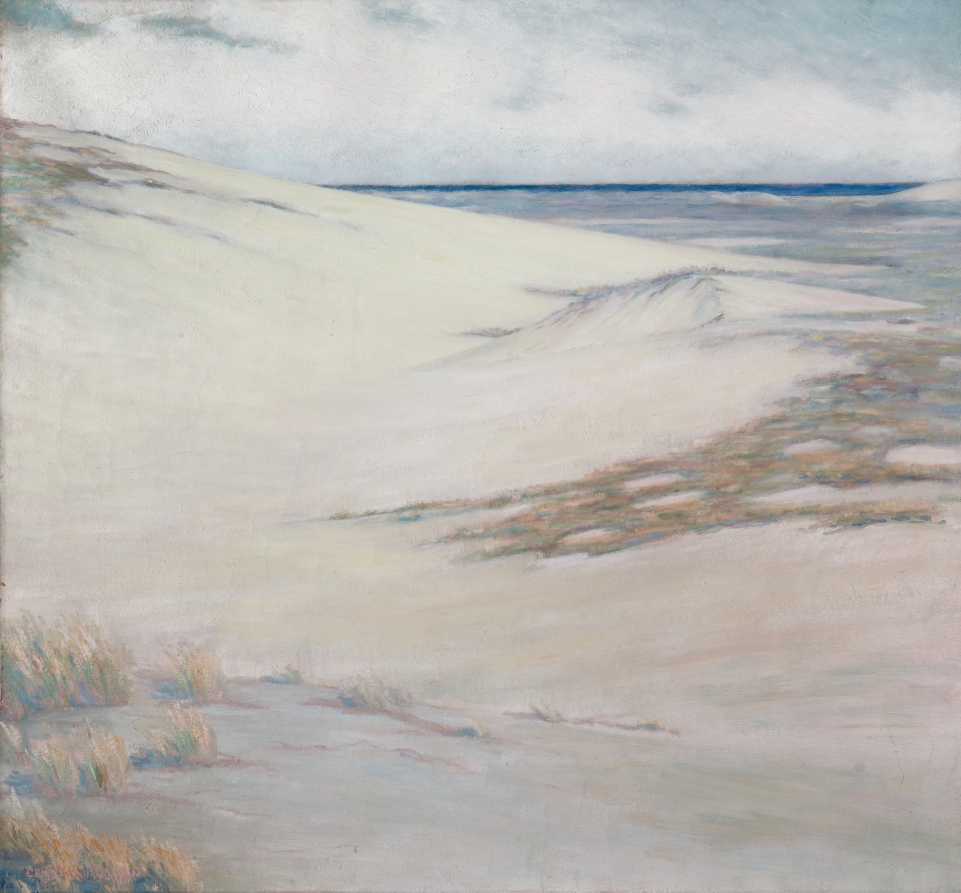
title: Over the Dunes, Cape Cod, Massachusetts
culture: America, Ohio, Cleveland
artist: Charles Shackleton (American, 1856–1920)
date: c. 1919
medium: oil on canvas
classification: Painting